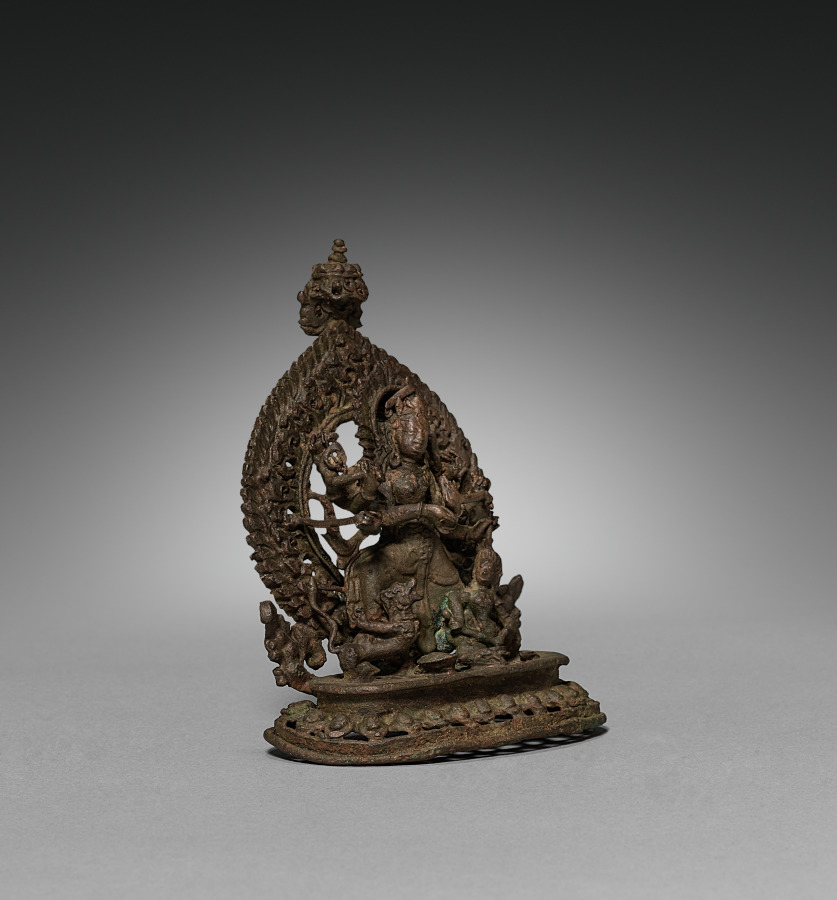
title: Durga Slaying the Demon Buffalo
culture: Nepal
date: 1500s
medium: bronze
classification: Sculpture